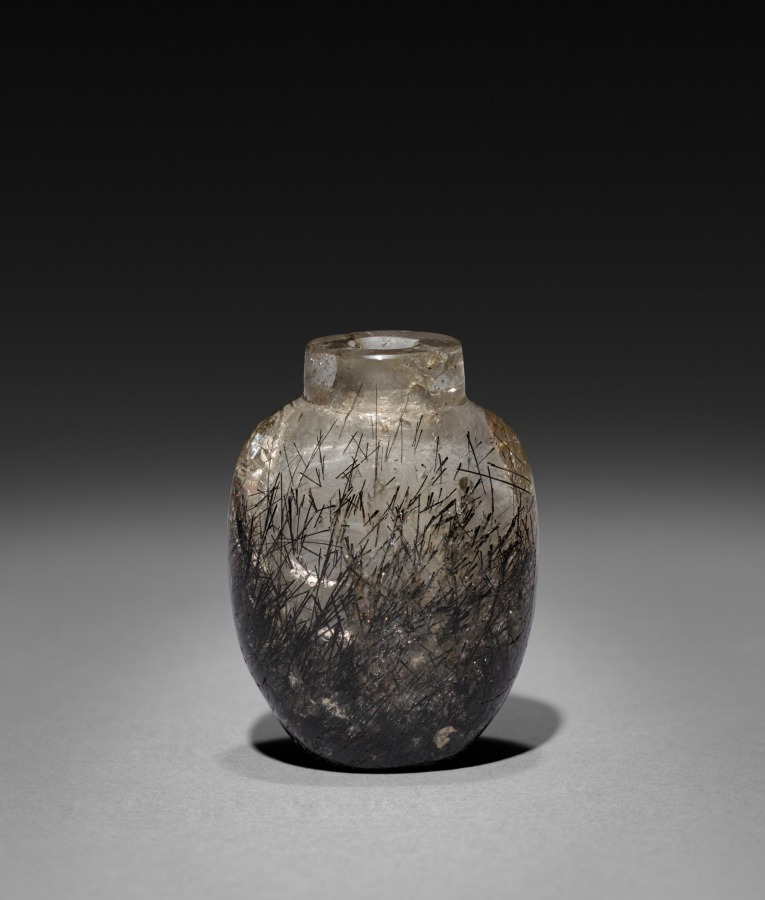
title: Snuff Bottle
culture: China, Qing dynasty (1644-1911)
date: 1644–1911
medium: glass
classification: Glass